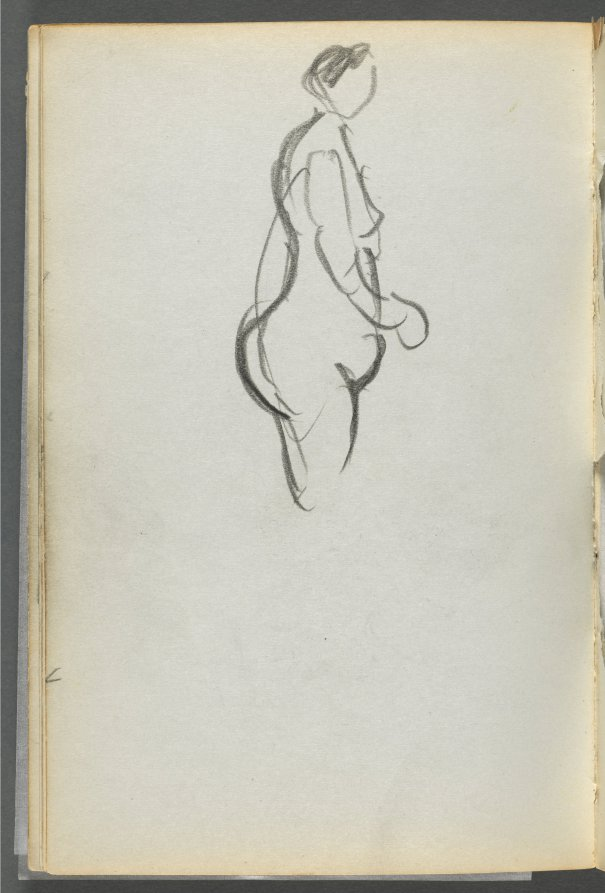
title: Sketchbook, The Dells, N° 127, page 092: Nude in Profile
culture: America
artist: Maurice Prendergast (American, born Newfoundland [now Canada], 1858–1924)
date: c. 1919–1921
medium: graphite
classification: Bound Volume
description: This sketchbook contains 59 pages of graphite drawings and 16 watercolors made at various locations on Cape Ann, Massachusetts.